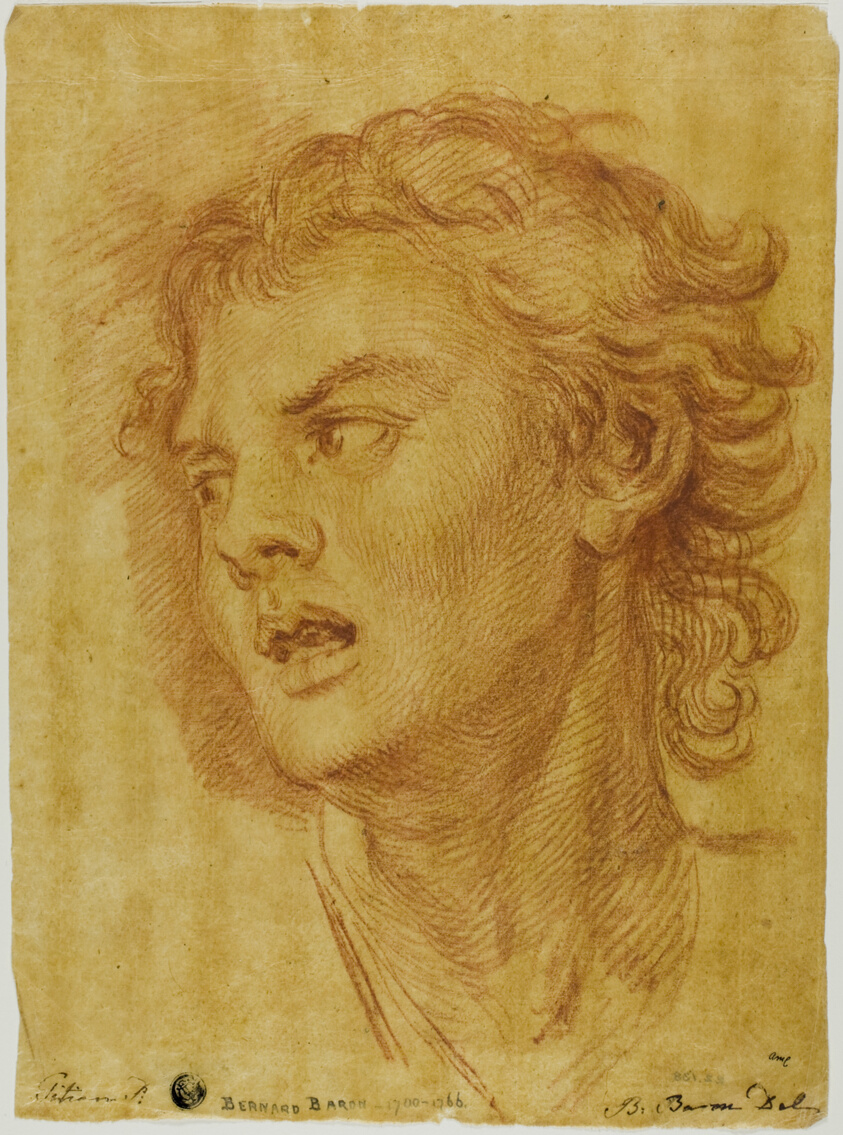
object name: Drawing and Watercolor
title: Head of a Hunter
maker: Bernard Baron (French, 1696-c. 1766); after Tiziano Vecellio, called Titian (Italian, c. 1488-1576)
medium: Red chalk on oiled golden-yellow transparentized laid paper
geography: France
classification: chalk; drawings (visual works); prints and drawing